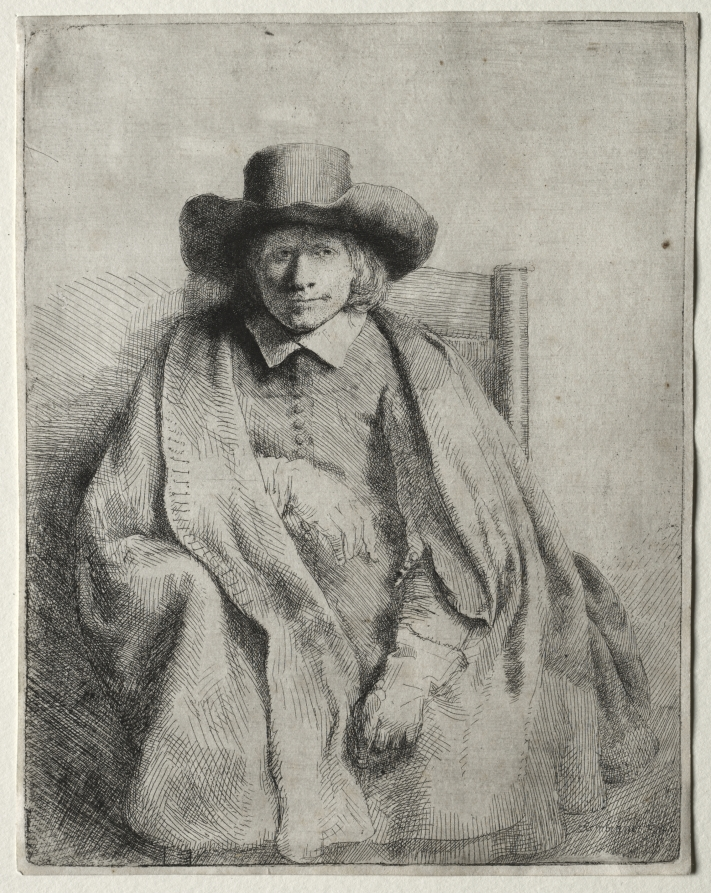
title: Clement de Jonghe, Printseller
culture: Netherlands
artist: Rembrandt van Rijn (Dutch, 1606–1669)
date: 1651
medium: etching, drypoint, and engraving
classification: Print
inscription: lower right, in plate: Rembrandt f. 1651 ; VERSO, lower left, in graphite: R695N ; lower left, in graphite: B. 272a ; lower left, in graphite: 220 272 ; lower center, in graphite: Premiere Epr ; lower center, in graphite: N. 252.